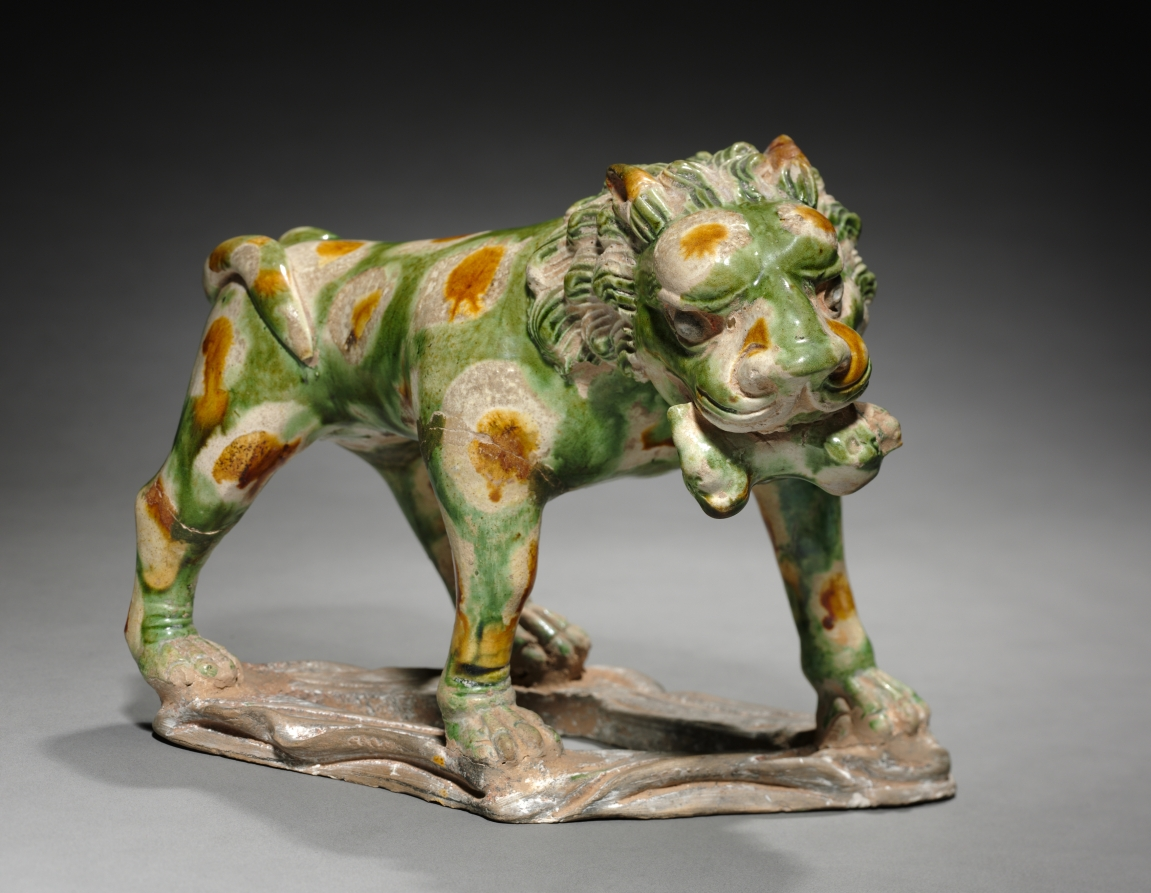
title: Lion with Cub in Mouth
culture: China, Tang dynasty (618-907)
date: 618–907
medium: earthenware with polychrome glaze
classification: Sculpture